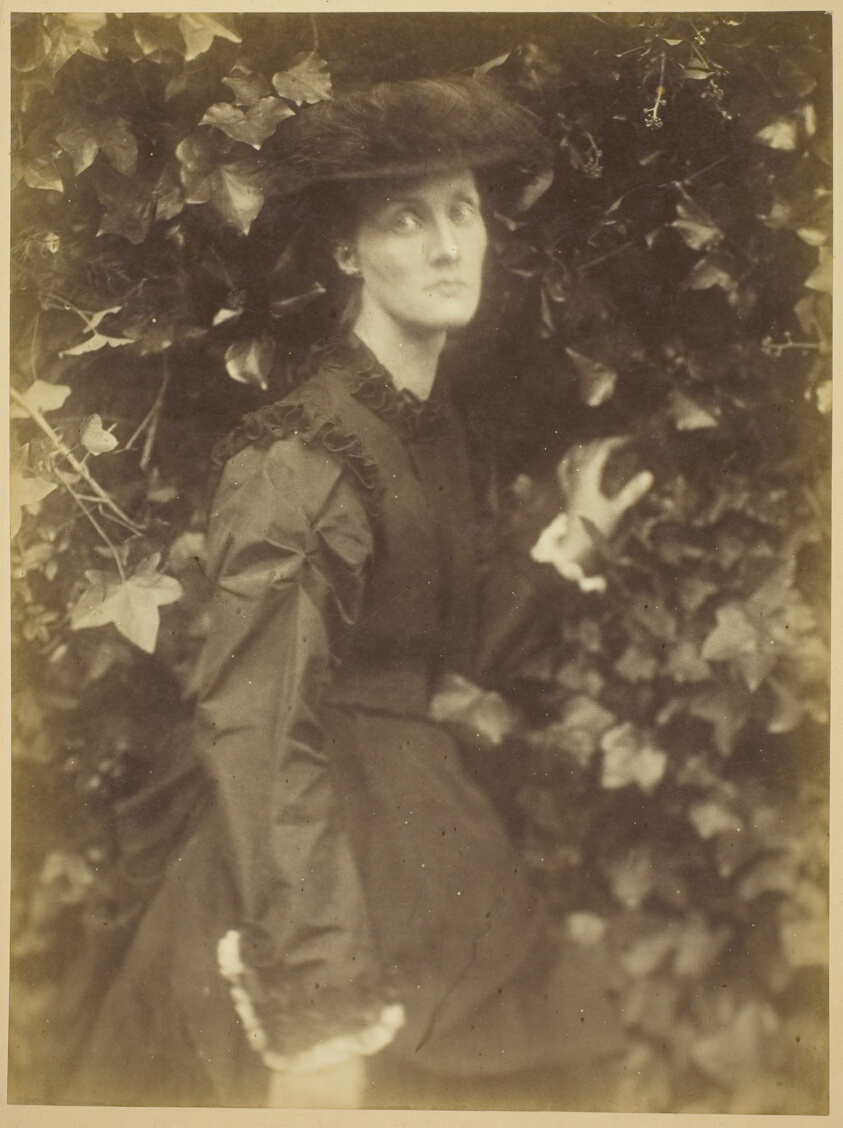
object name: Photograph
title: Mrs. Herbert Duckworth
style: 19th century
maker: Julia Margaret Cameron (English, 1815–1879)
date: September 1874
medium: Albumen print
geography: England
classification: albumen silver print; photographic process; photography; photograph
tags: portraits, portraits: female subject, photography